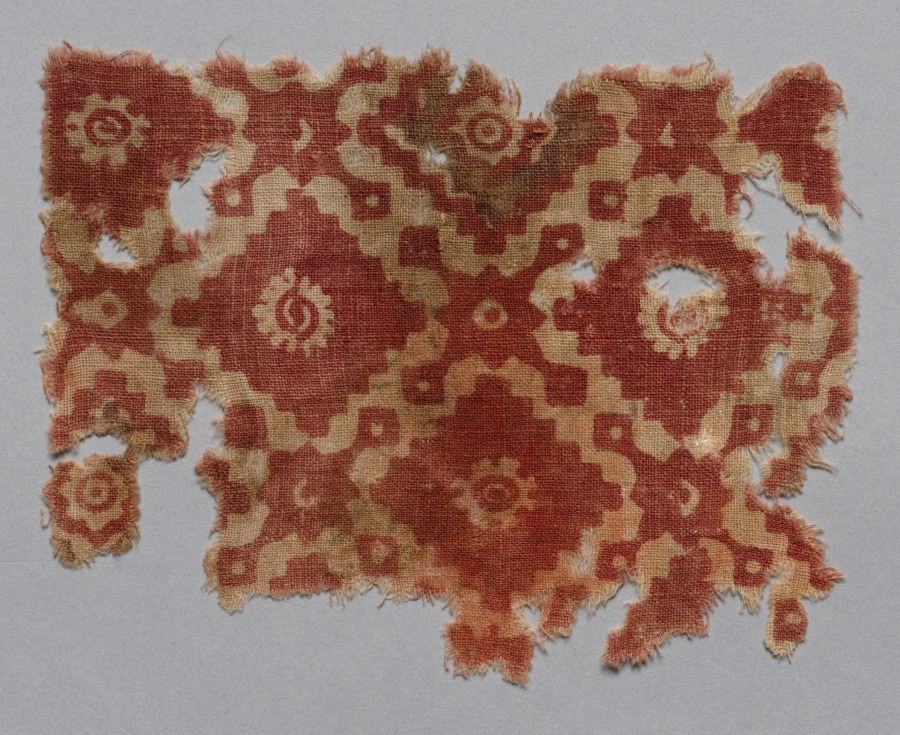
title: Fragment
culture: India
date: 1100s–1300s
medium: plain cloth, resist dyed; cotton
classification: Textile